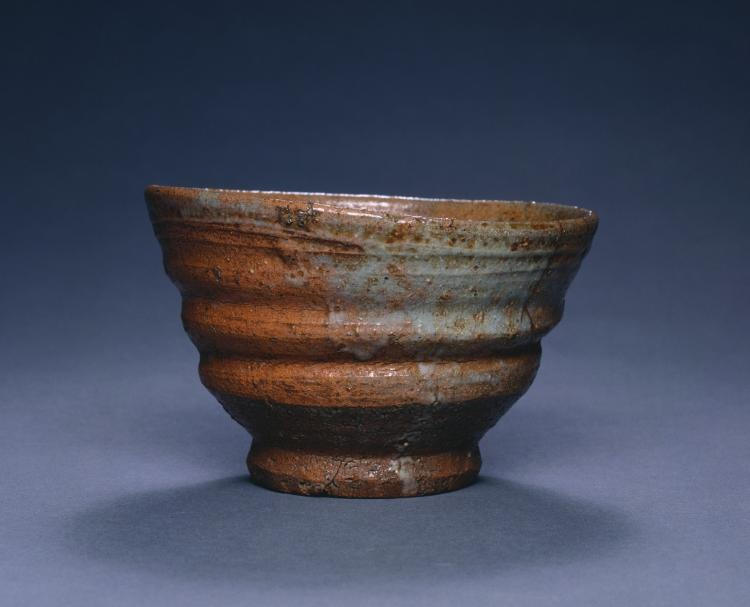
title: Tea Bowl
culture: Korea, Joseon dynasty (1392–1910)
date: 1600s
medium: glazed stoneware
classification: Ceramic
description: This type of wide-mouthed bowl was used every day in Korea, not exclusively for tea drinking. But when it was introduced to Japan around the early 16th century, its imperfect appearance, which evokes the aesthetics of wabi-sabi, caused it to be repurposed as a tea bowl. Korean tea bowls were circulated as a item of foreign luxury among Japanese military elites. This type of tea bowl may have been produced in one of the kilns established and operated by the trading office (Waegwan) in Busan, southern Gyeongsang province, as an export item for Japanese tea bowl collectors.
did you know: For its imperfect aesthetics, this type of rustic tea bowl was highly appreciated among advanced Japanese practitioners of the tea ceremony.